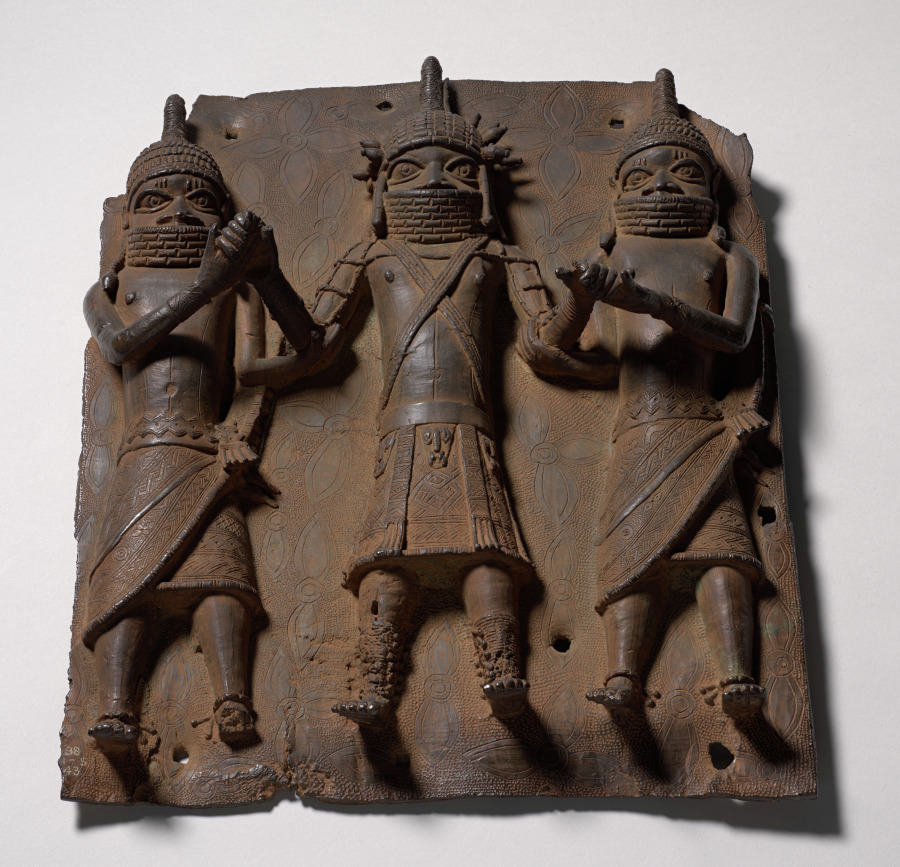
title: Plaque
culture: Nigeria, Benin Kingdom, Ẹdo peoples, members of the Igun Eronmwon (royal brasscasters) guild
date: 1500s–1600s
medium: Copper alloy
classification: Sculpture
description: Nearly 900 metal plaques once adorned the Ọba’s palace courtyard, documenting Benin’s history and customs. This one depicts two male attendants (enobore) supporting an Ọba. It uses hierarchical composition: important figures are large and centered. Everything about the Ọba is greater than his companions: their bodies, clothing, and jewelry. The flanking attendants physically support a man weighed down by heavy royal garments and responsibilities. Brasscasters skillfully cast their clasping hands projecting from the plaque. The bottom left number means the British Museum formerly owned this. It entered their collection in 1898, one year after British troops took it from a palace storeroom during the Siege of Benin.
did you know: Look at the side of this plaque. The designs on the slender edges are considered visual "signatures" of the different casters who made plaques for the Oba of Benin.